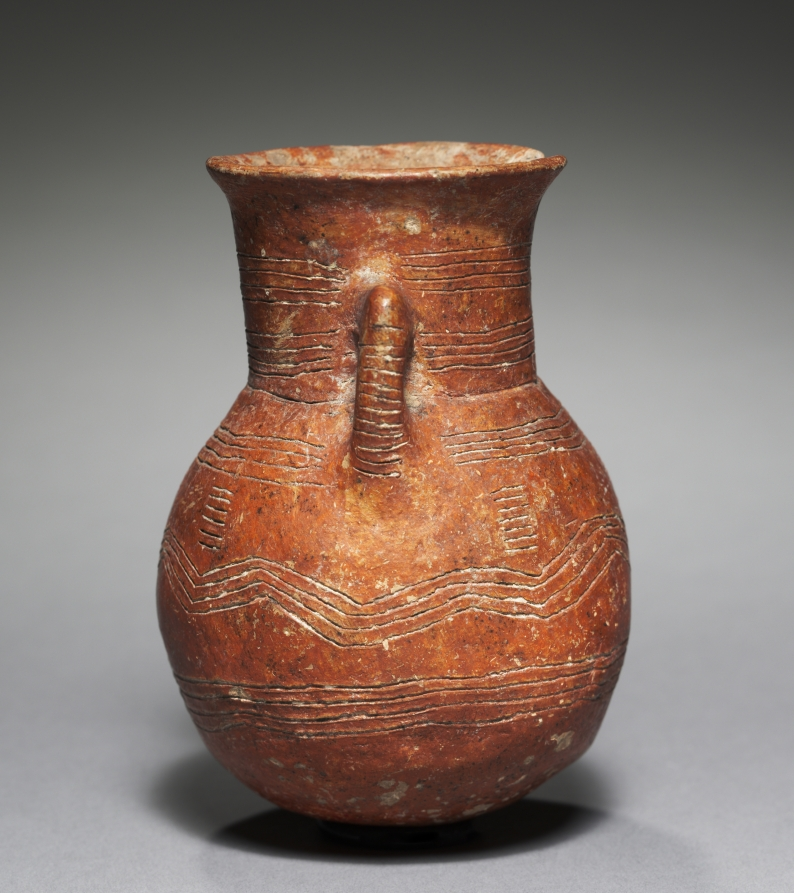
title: Amphora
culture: Cyprus, early Cypriot III–middle Cypriot I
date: c. 2000–1800 BCE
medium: red ware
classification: Ceramic